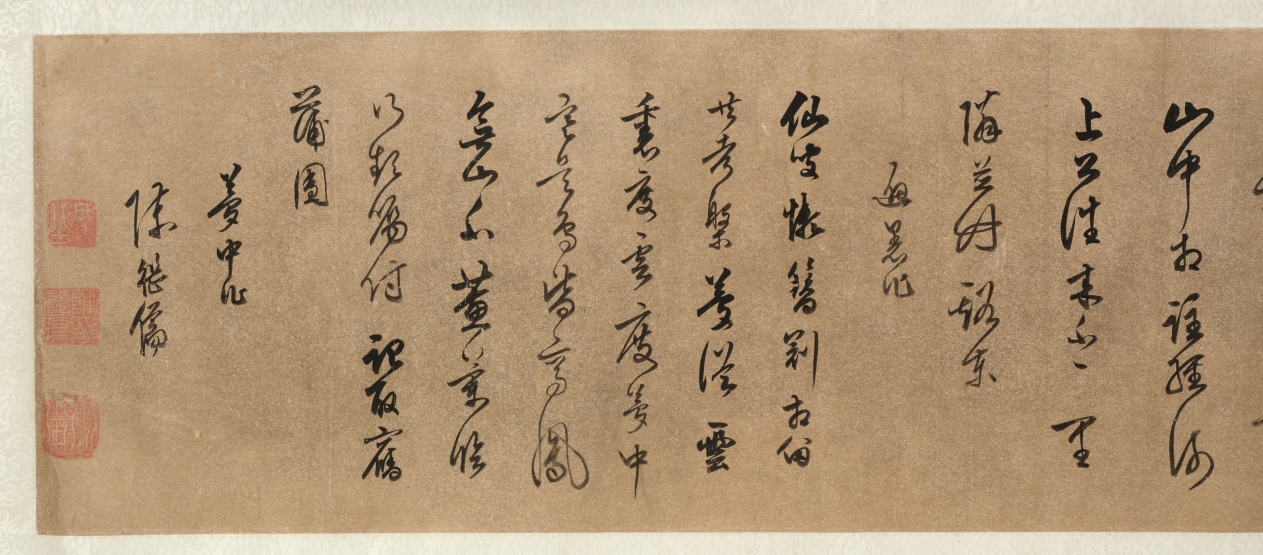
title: Four Poems: Calligraphy in Cursive Script (xingshu)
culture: China, Ming dynasty (1368–1644)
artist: Chen Jiru (Chinese, 1558–1639)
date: 1500s-1600s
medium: handscroll; ink on gold speckled paper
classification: Calligraphy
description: Written in graceful calligraphy with well-composed characters, the artist communicates his thoughts and state of mind in four poems. Characters written in dark, thick strokes convey rhythm, and indicate the moment after the writer had paused to recharge his brush with ink. Chen Jiru was a native of Huating (modern Shanghai). His calligraphy style resembles that of his friend, influential calligrapher Dong Qichang (1555–1636). Unlike Dong, Chen did not pursue government service: he burned his Confucian robes, declined a summons to serve at court, and immersed himself in literature, calligraphy, and painting.